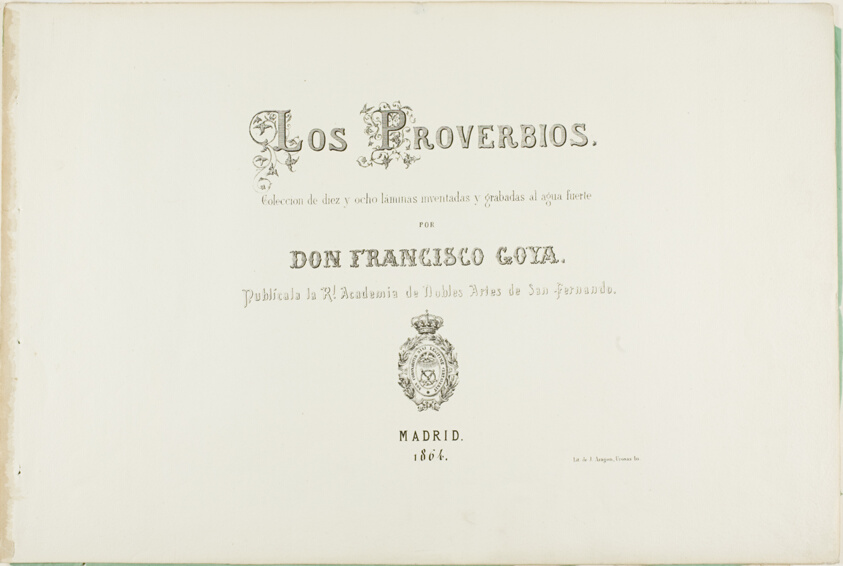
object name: Print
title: Title Page from Los Proverbios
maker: Francisco José de Goya y Lucientes (Spanish, 1746-1828)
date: 1864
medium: Lithographic title page on ivory wove paper with three unprinted sheets of thin paper - one green and two cream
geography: Spain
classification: lithograph; print; prints and drawing